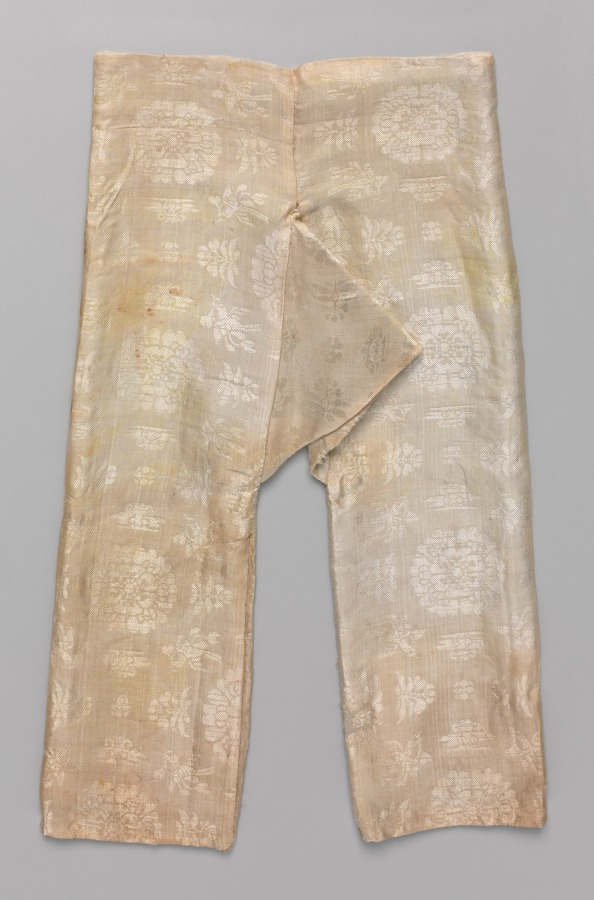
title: Prince's trousers and lining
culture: China, Tang dynasty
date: 700s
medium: twill damask: silk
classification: Garment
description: This coat and pants are part of a set of garments that originally included an outer pair of pants and silk boots made from the same material as the coat. Such rich garments would have been worn by a member of the imperial family or nobility. The fabrics comprising this outfit were woven in widely distant parts of Asia. The silk of the coat, with ducks in pearl roundels, was woven in Sogdiana. The white silk of the pants, ornamented with flowers and birds, is Chinese. Both garments are lined with a Chinese silk woven with a radial floral pattern that was common during the 700s. The coat and pants were made at a time when Tibetan power extended to parts of China, eastern Central Asia, and the trade routes to Sogdiana.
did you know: The pants are made of three parts: two rectangles folded down their length and joined by an inseam, a center front seam, and a back seam; a third piece is a square folded to form a triangle and inserted into the inseam at the crotch